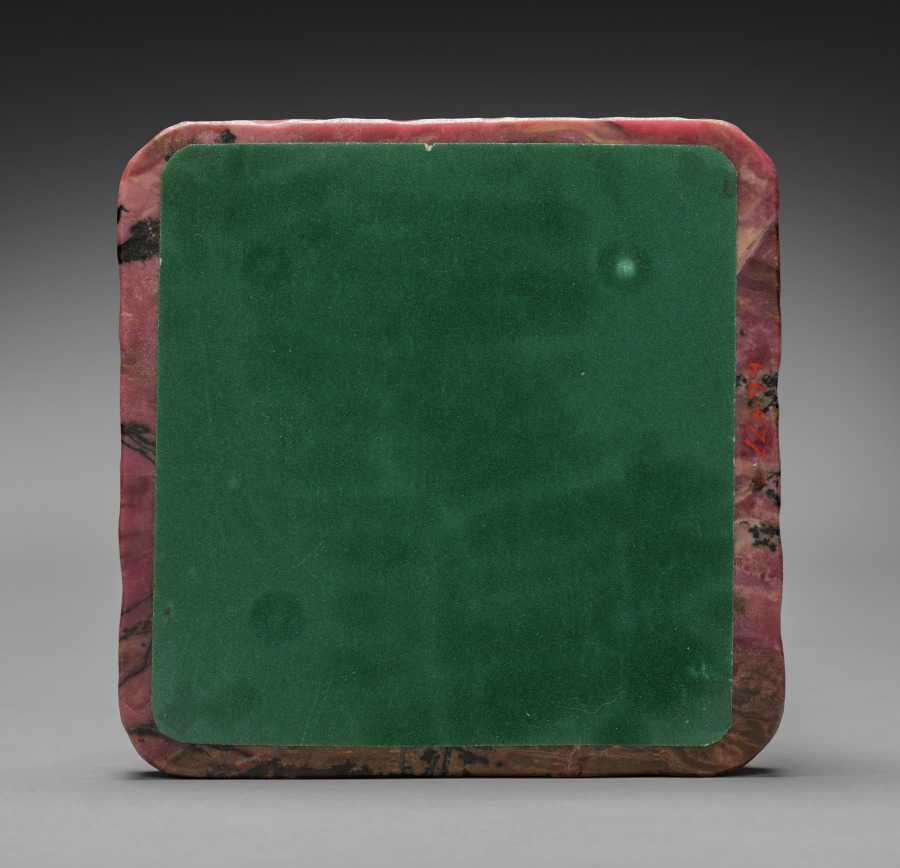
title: Kremlin Tower Clock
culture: Russia, St. Petersburg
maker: House of Fabergé (Russian, 1842–1918)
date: c. 1913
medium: rhodonite, silver, enamel, emeralds, sapphires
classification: Timepiece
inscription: 84, Kokoshnik, delta [assay mark for Moscow, 1908-26]; 91, Kokoshnik; 91; Kokoshnik; C. Fabergé (in Cyrillic); double-headed eagle [imperial warrant]; 16419 k? scratched.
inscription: Painted on clock face: Le Gruet (in script); strike, silence, set hand work (in English).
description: The use of Russian hardstones in creating precious objects became a hallmark of design from the House of Fabergé. Easily carved, these minerals were sourced largely from the western region surrounding the Ural Mountains. Fabergé's workmasters used colorful stones such as agate, nephrite (jade), lapis lazuli, rock crystal, and rhodonite, seen here in this elaborate table or mantel clock, to create all manner of luxurious accessories. Bright pink rhodonite was among the rarest, and consequently most expensive, specimens used by the House of Fabergé. This clock resembles the Taynitskaya Tower, the middle tower on the south side of the Kremlin. The House of Fabergé created this work to commemorate the 300th anniversary of the Romanov dynasty, representing Fabergé's ability to balance the functionality of objects with intricate decorative design.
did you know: The Kremlin tower, which this clock resembles, has a secret well and an underground tunnel that leads to the Moscow River.